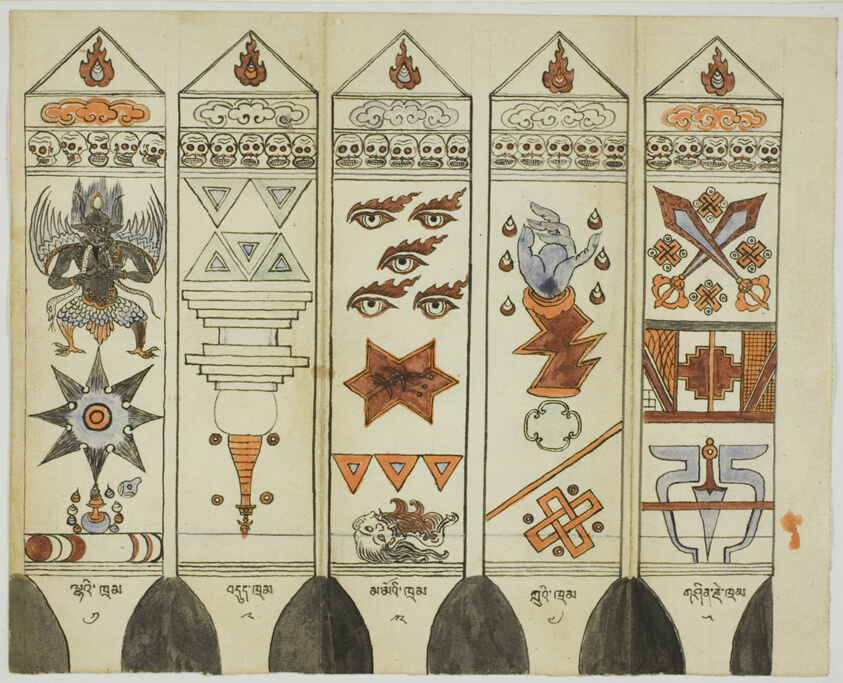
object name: Drawing and Watercolor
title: Part of a Ten-Piece Set of Printed Ritual Stakes (Khram Shing)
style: Himalayan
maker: Mongolia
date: 19th–20th century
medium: Opaque watercolor, watercolor, ink, and graphite on machine-made wove paper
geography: Mongolia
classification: pen and ink drawings; manuscript; asian art